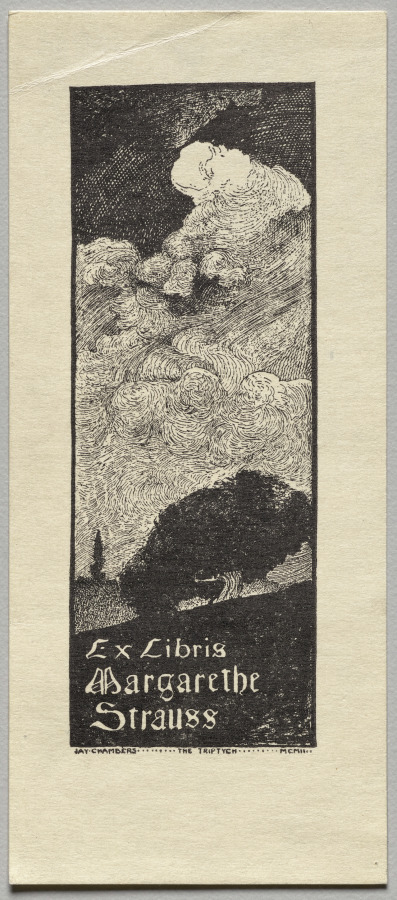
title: Bookplate: Margarethe Strauss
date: 1902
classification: Print